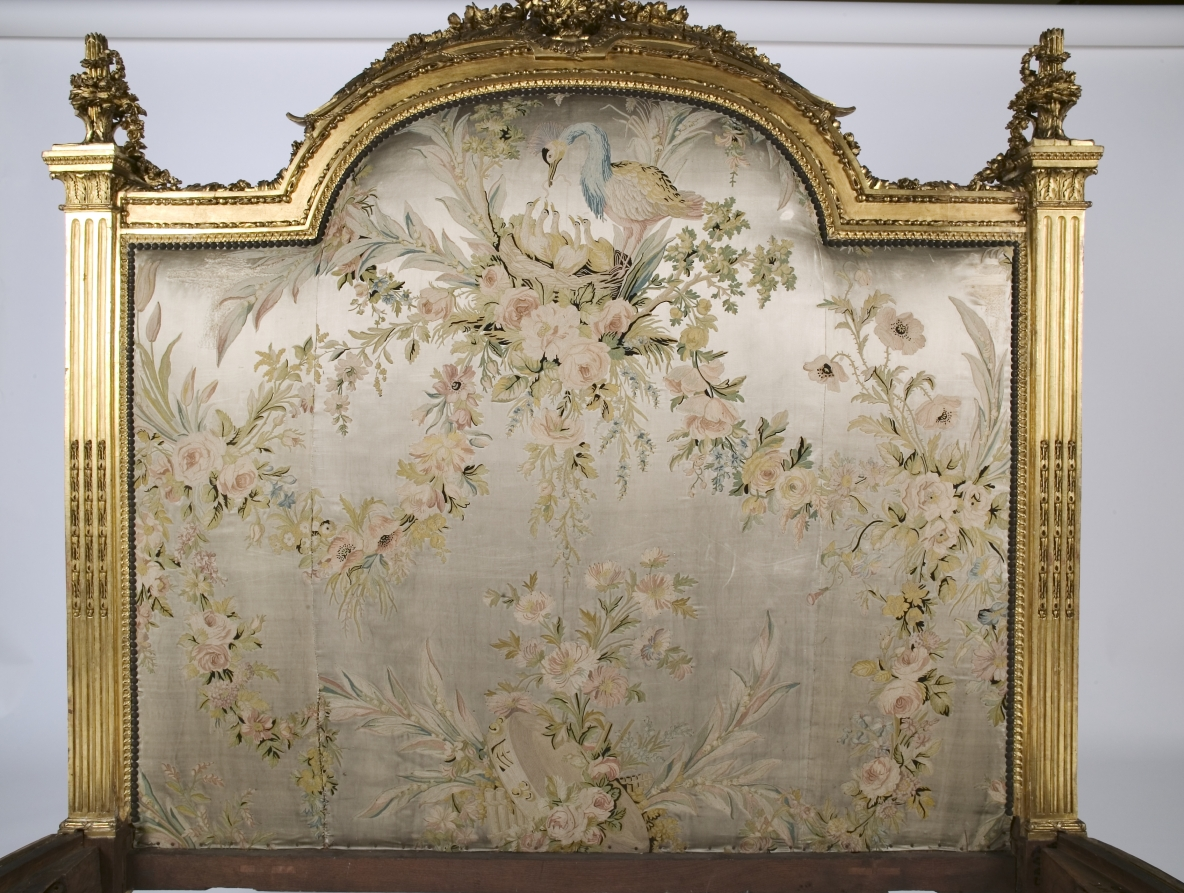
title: Bed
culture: France, 18th century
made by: attributed to Georges Jacob (French, 1739–1814)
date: 1700s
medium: gilded wood and embroidered satin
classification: Furniture and woodwork